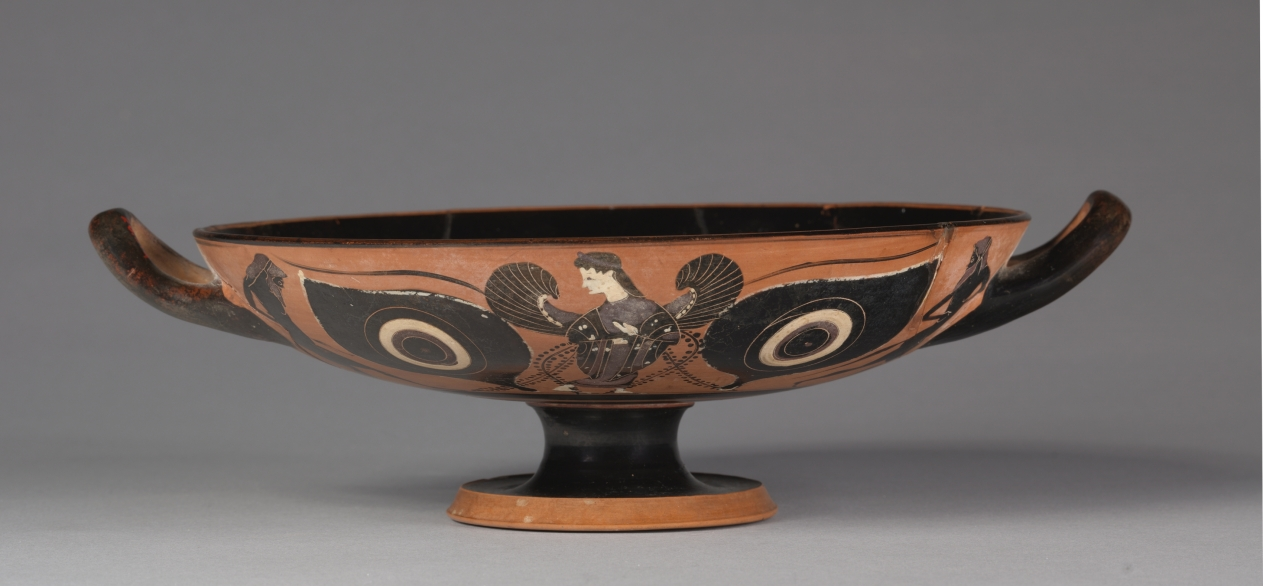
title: Black-Figure Eye Cup: Iris and Satyrs (A, B); Gorgoneion (I)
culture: Greek, Attic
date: c. 520–510 BCE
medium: ceramic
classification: Ceramic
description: Along with two large sets of eyes on its exterior, this drinking vessel also features other figures: a winged female, probably Iris, between each pair of eyes, and pairs of satyrs flanking them; a winged dolphin beneath each handle; and a frontal Gorgoneion, or face of Medusa, baring her teeth and tongue within the tondo. Although the eyes and Gorgoneion may serve to ward off evil, they also make for fluid identities while drinking, inviting drinkers to enter the mythical realm. For when tilting such cups to imbibe, drinkers confront monstrous beings while simultaneously masking their faces from others.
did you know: The eye cup takes its name from the large eyes on its exterior.